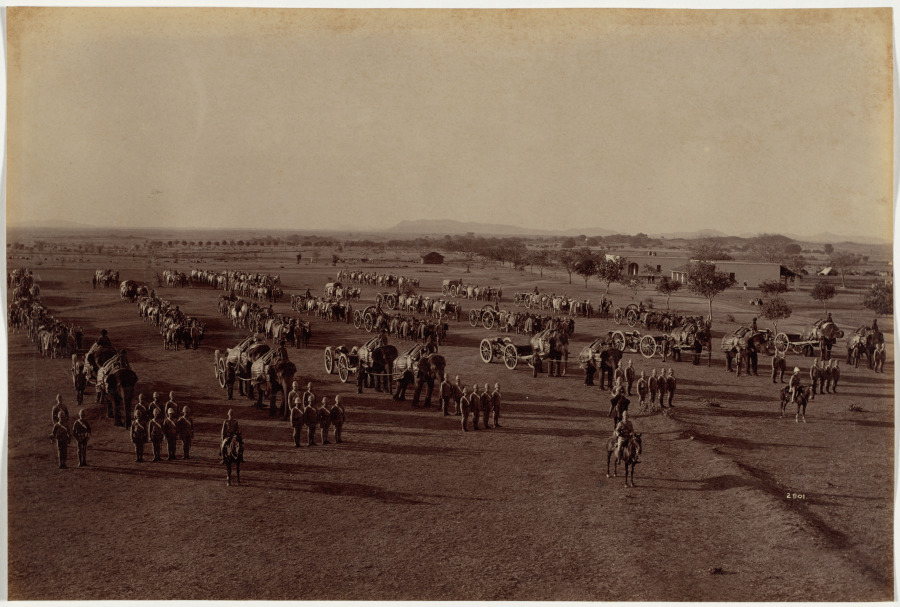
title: Elephant Battery on Parade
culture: India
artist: Raja Deen Dayal (Indian, 1844–1905)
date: 1886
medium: albumen print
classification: Photograph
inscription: No visible inscriptions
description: Exercises involving elephant batteries, which were exotic to European eyes, attracted spectators; photographs of them were excellent souvenirs of these military forces employed by the British Indian Army. Elephants had been employed in warfare in India since at least the 500s BC, but with the advent of heavy artillery, their function switched from attack to support. They transported big guns and supplies and worked in logging and construction. It took many cattle to pull a load that could be handled by two elephants.